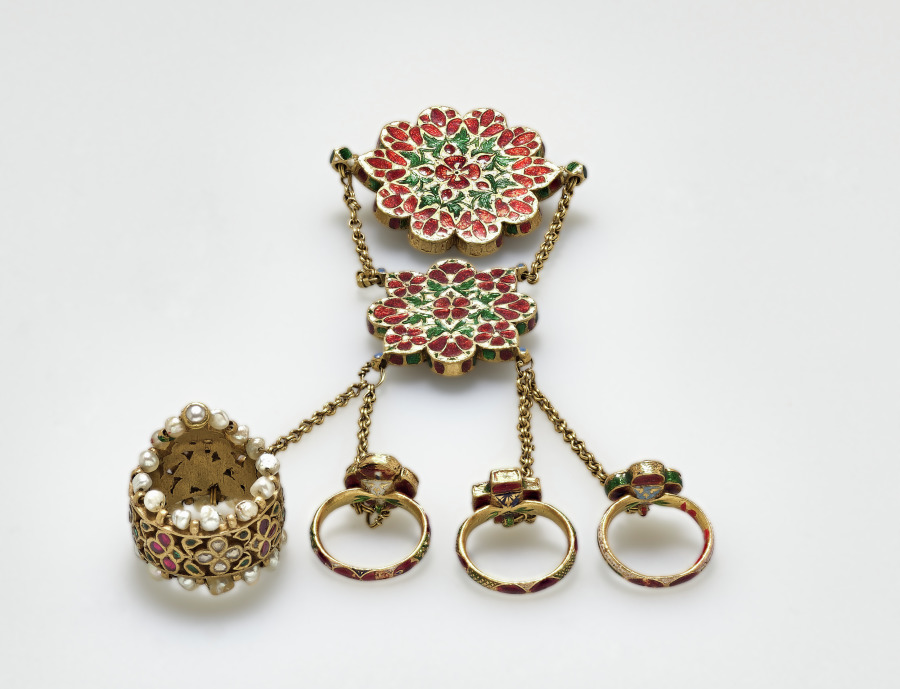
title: Set of Rings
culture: India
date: 1800s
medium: Gold with white, green, and red enamel; rubies, emeralds, clear quartz, and pearls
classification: Jewelry